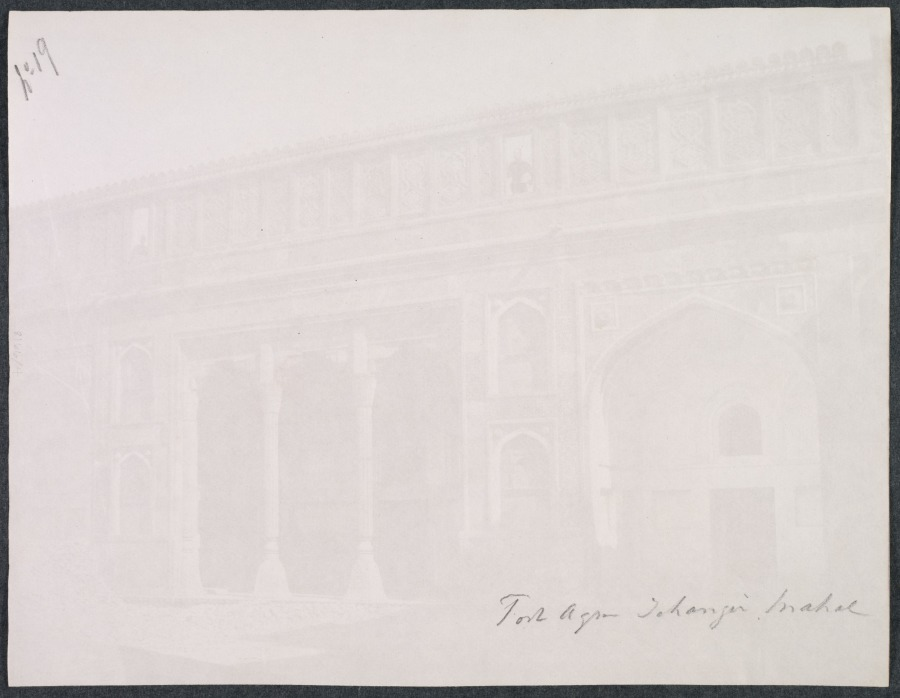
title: Untitled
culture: 19th century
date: c. 1879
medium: Albumen print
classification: Photograph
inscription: Written in pencil on verso: "no 19" Written in pencil on verso: "Fort Agra Jahangir Mahal" Imprinted in black type on adhesive label on polyethelene sleeve: "Asie: Anonyme (BB154)/Inde. Le port pres du Taj./Tirage albumin d'epoque. Circa 1879. 21/x27 cm./320.00€"